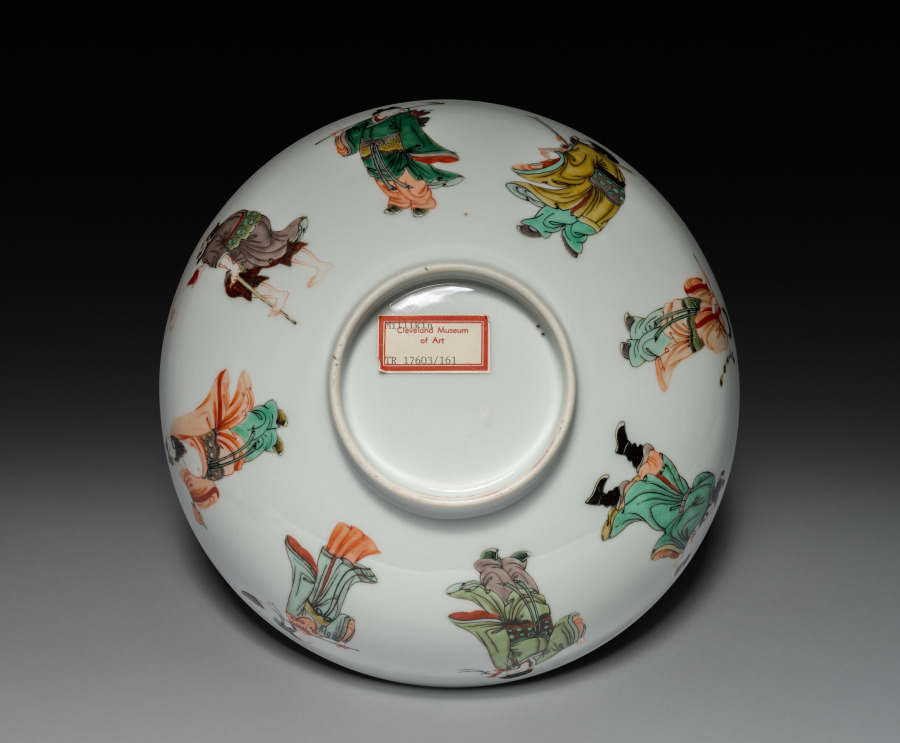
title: Bowl with Eight Immortals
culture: China, Jiangxi province, Jingdezhen kilns, Qing dynasty (1644-1911), Kangxi reign (1662-1722)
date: 1662–1722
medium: porcelain with famille verte overglaze enamel decoration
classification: Ceramic